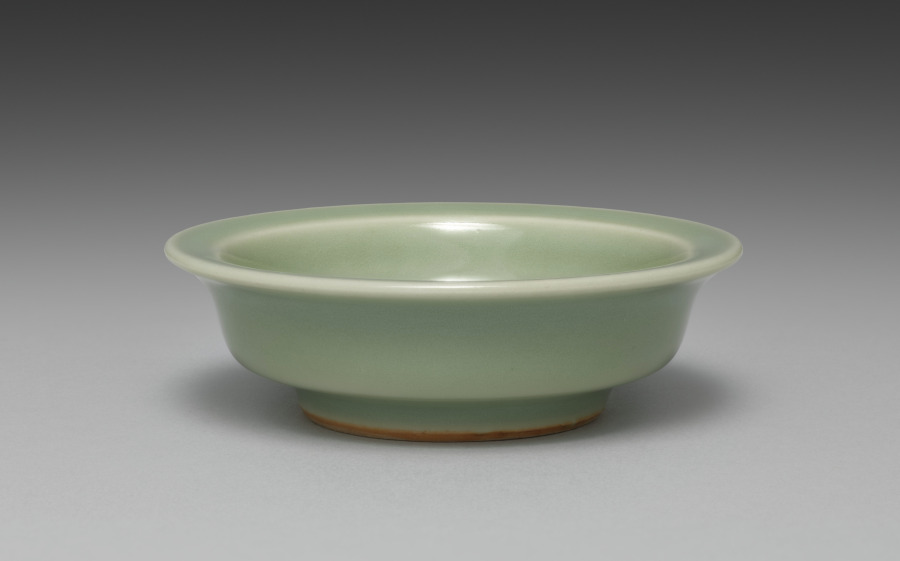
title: Saucer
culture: Japan, Meiji period (1868–1912)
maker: Seifū Yohei III (Japanese, 1851–1914)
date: 1893–1914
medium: One from a set of ten dishes; porcelain with green glaze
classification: Ceramic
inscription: 清風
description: Yohei III’s main output for his sophisticated clientele was in the form of tea sets and dining sets. He created a range of dishes in green glazes. He often produced in pairs, sets of five, or sets of ten. For this set of ten small dishes in a simple, round form that emphasizes the glaze above all, the box lid designates the piece as seiji, or green-glazed porcelain, using a general term for the extensive palette of green glazes often called celadon in English. The box lid further identifies the dishes themselves as tōchō, literally “bean-sized saucers,” a size that makes them suitable for dipping sauces.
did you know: The ten dishes in this set are stored in stacks of five in a two-compartment box.